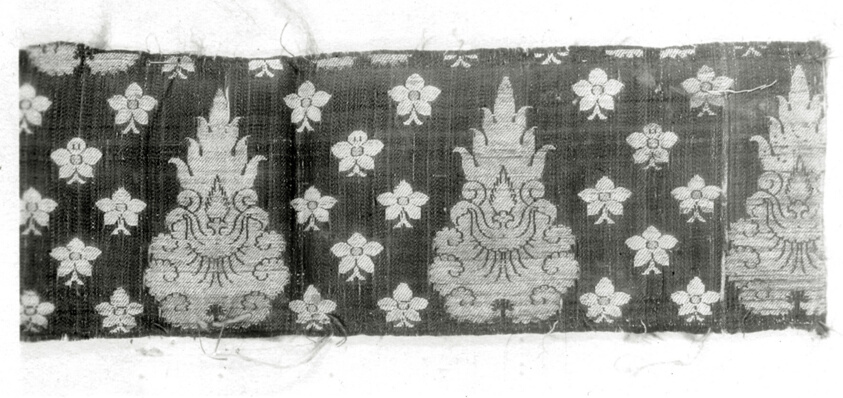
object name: Textile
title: Fragment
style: isfahan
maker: Iran (Persia, Isfahan)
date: 18th century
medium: Brocaded plain simple satin, silk, gold wound on yellow silk core, silver wound on white silk core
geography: Iran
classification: textile; weaving